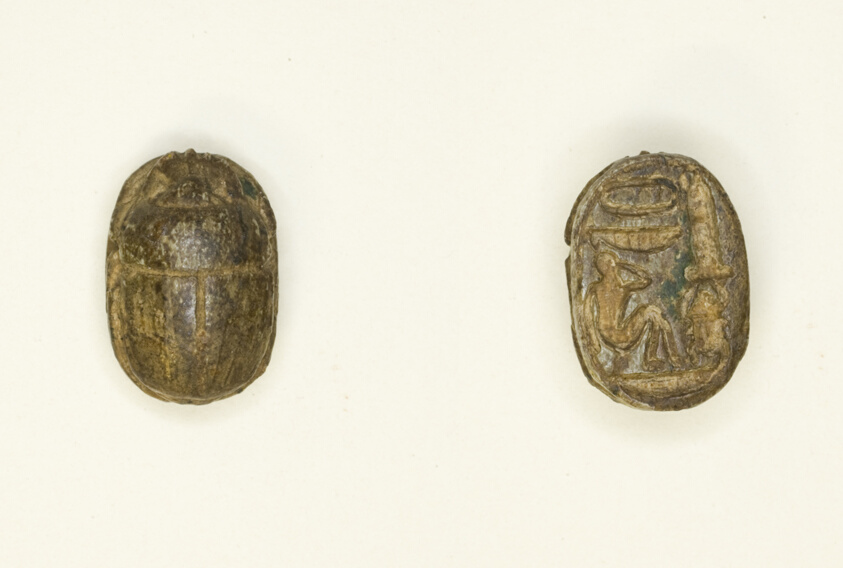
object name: Costume and Accessories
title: Scarab: Wish Formula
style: egyptian, third intermediate period, new kingdom, late period (egyptian), ancient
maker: Egyptian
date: New Kingdom–Late Period, Dynasties 19–26 (about 1295–525 BCE)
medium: Steatite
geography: Egypt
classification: scarab; ancient art; costume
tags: scarab beetle, monuments, insects, Hieroglyphs, children, babies